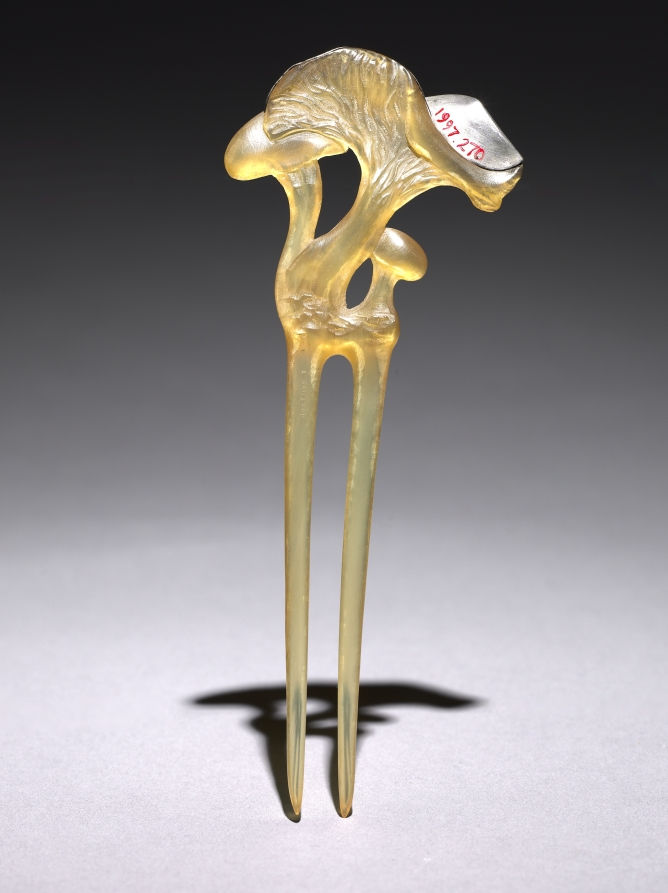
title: Hair Ornament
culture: France, early 20th Century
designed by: Jeannine Chenneviere (French)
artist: possibly by Lucien Gaillard (French, 1861–1942)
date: c. 1903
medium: horn with silver mounts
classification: Jewelry